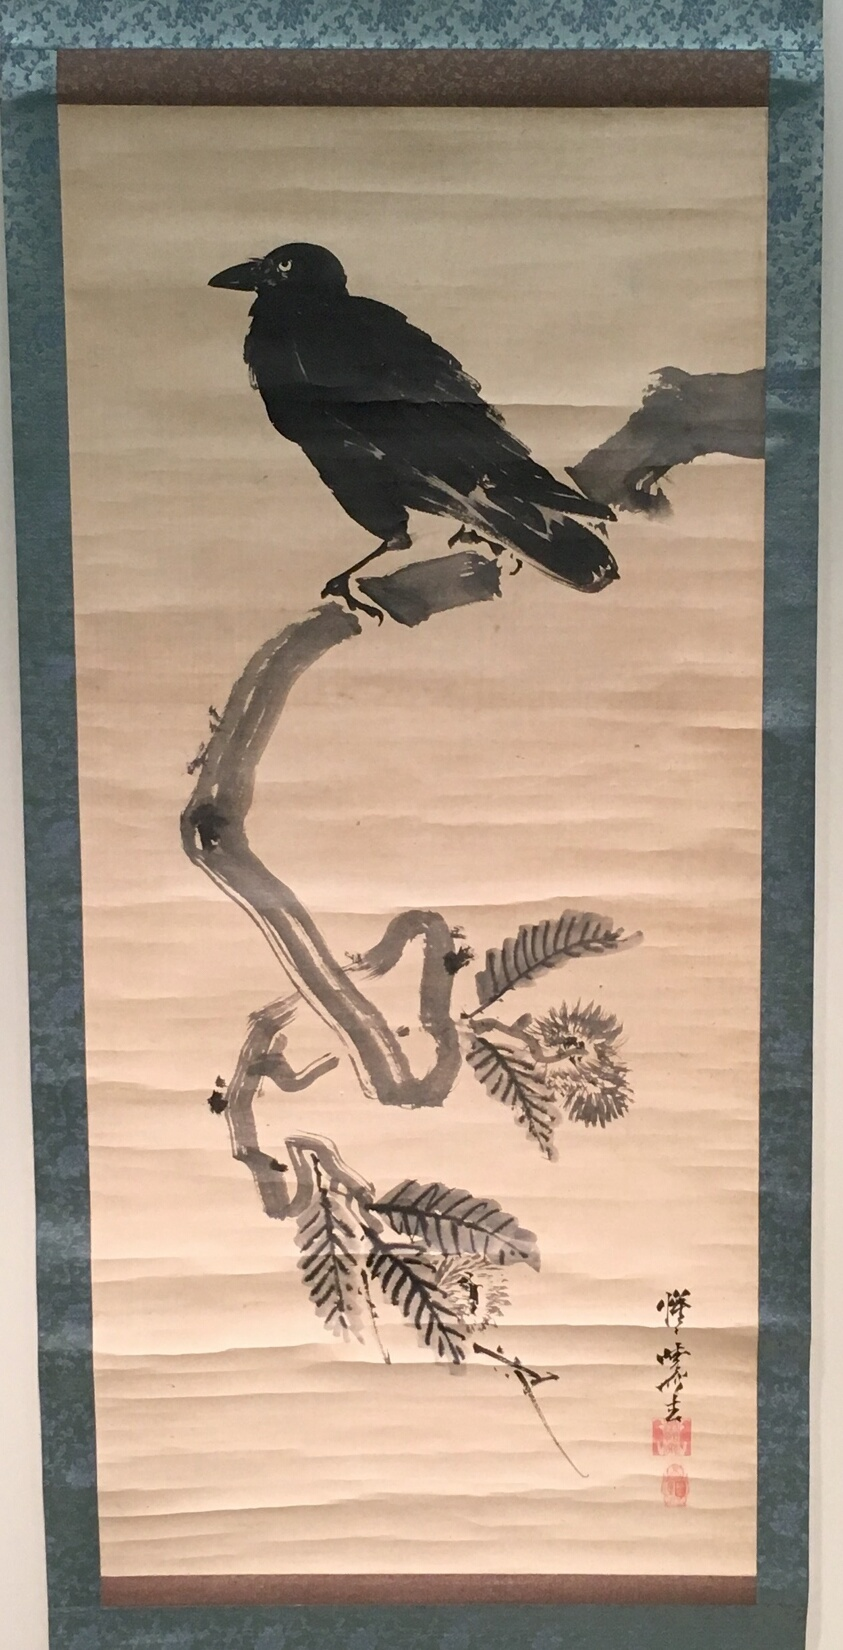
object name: Print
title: Crow on pine branch.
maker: Kawanabe Kyosai; Japanese, 1831-1889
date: about 1868-1889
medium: Hanging scroll; ink on paper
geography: Japan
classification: hanging scroll; painting; asian art; print